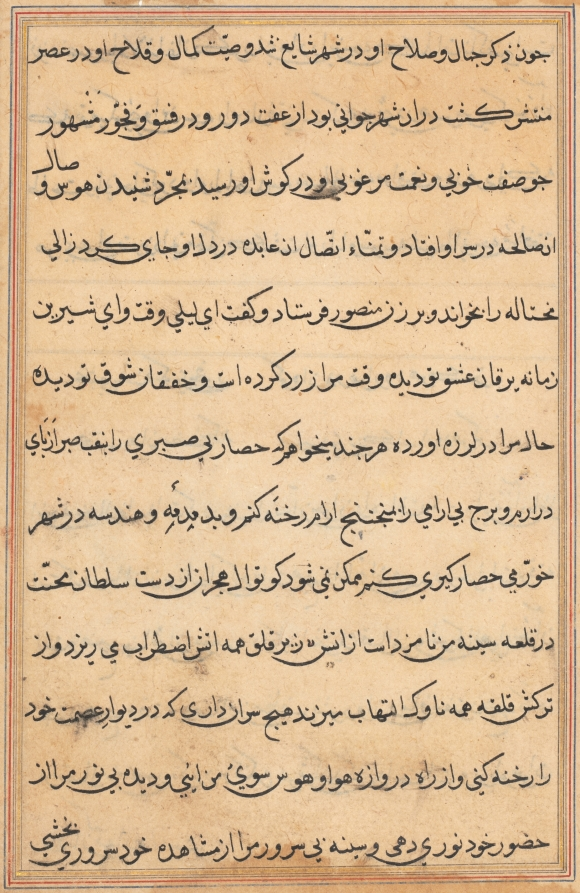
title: Page from Tales of a Parrot (Tuti-nama): text page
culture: Mughal India, court of Akbar (reigned 1556–1605)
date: c. 1560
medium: gum tempera, ink, and gold on paper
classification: Painting